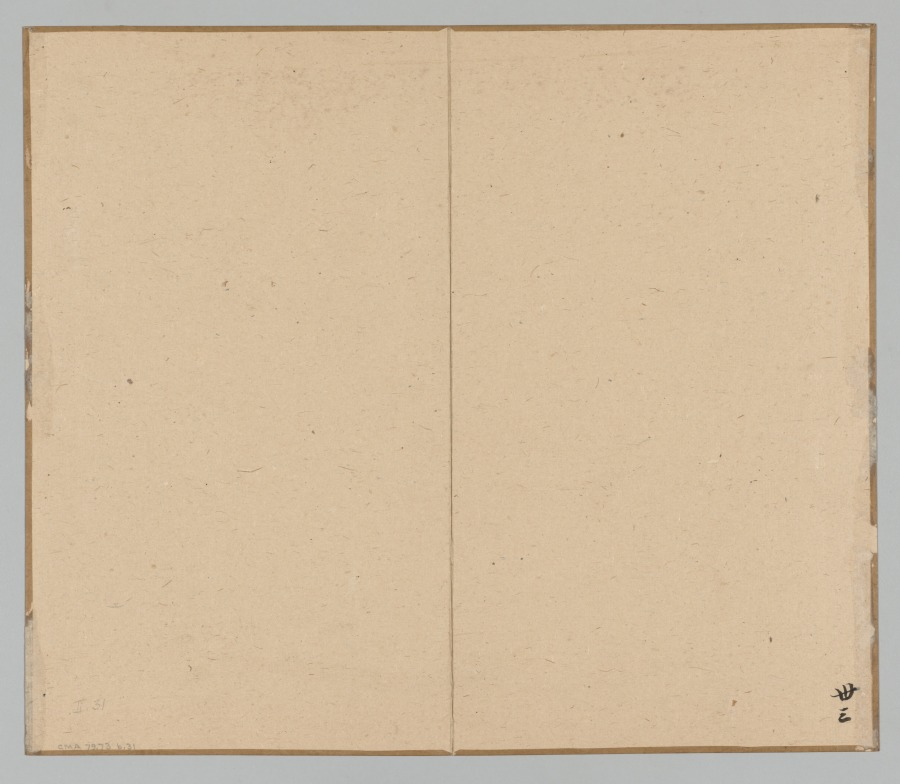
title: Reverberations of Taiga, Volume 2 (leaf 31)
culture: Japan, Edo period (1615–1868)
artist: Aoki Shukuya (Japanese, d. 1802)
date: mid- to late 1700s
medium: double-leaf from a pair of albums; ink and light color on paper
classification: Portfolio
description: Traditionally, young painters in Japan began their studies with an established master-painter. The master's compositions invariably became models that the apprentice copied to learn various ink and brush techniques. Shukuya was a pupil of the famous Kyoto artist Ikeno Taiga, whose style is reflected in these sketches of rocks, trees, and mountains.